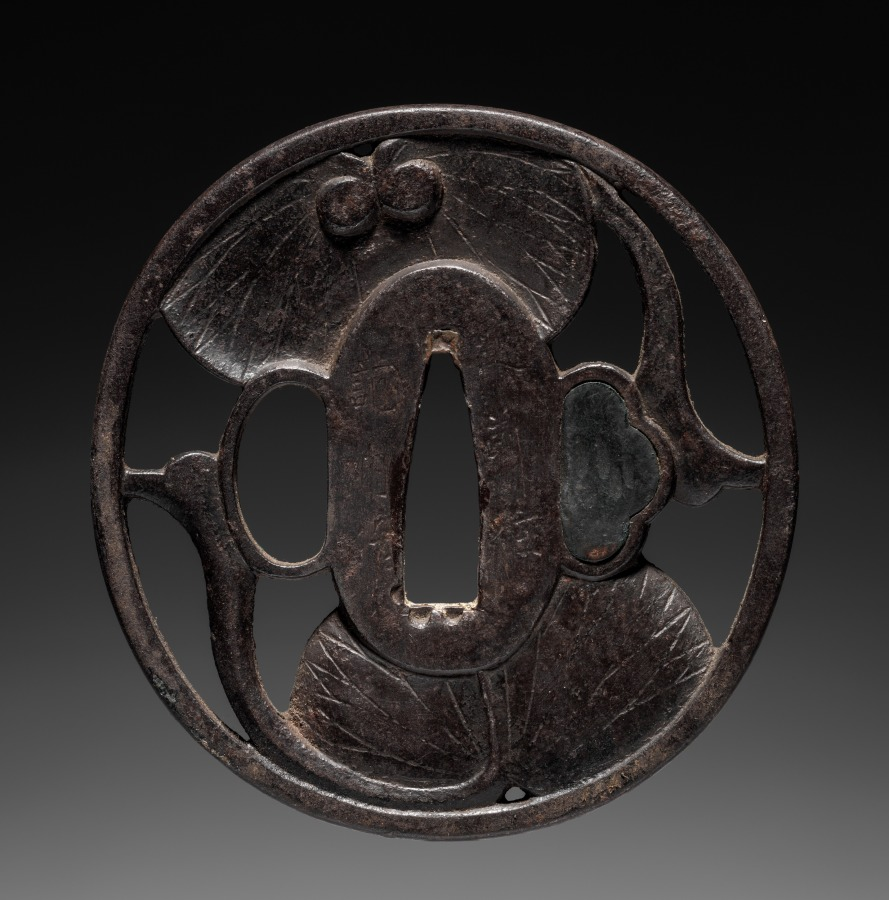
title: Sword Guard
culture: Japan, Edo period (1615–1868)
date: mid-1700s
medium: iron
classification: Arms and Armor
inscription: Signature: Kinai, residing in Echizen province